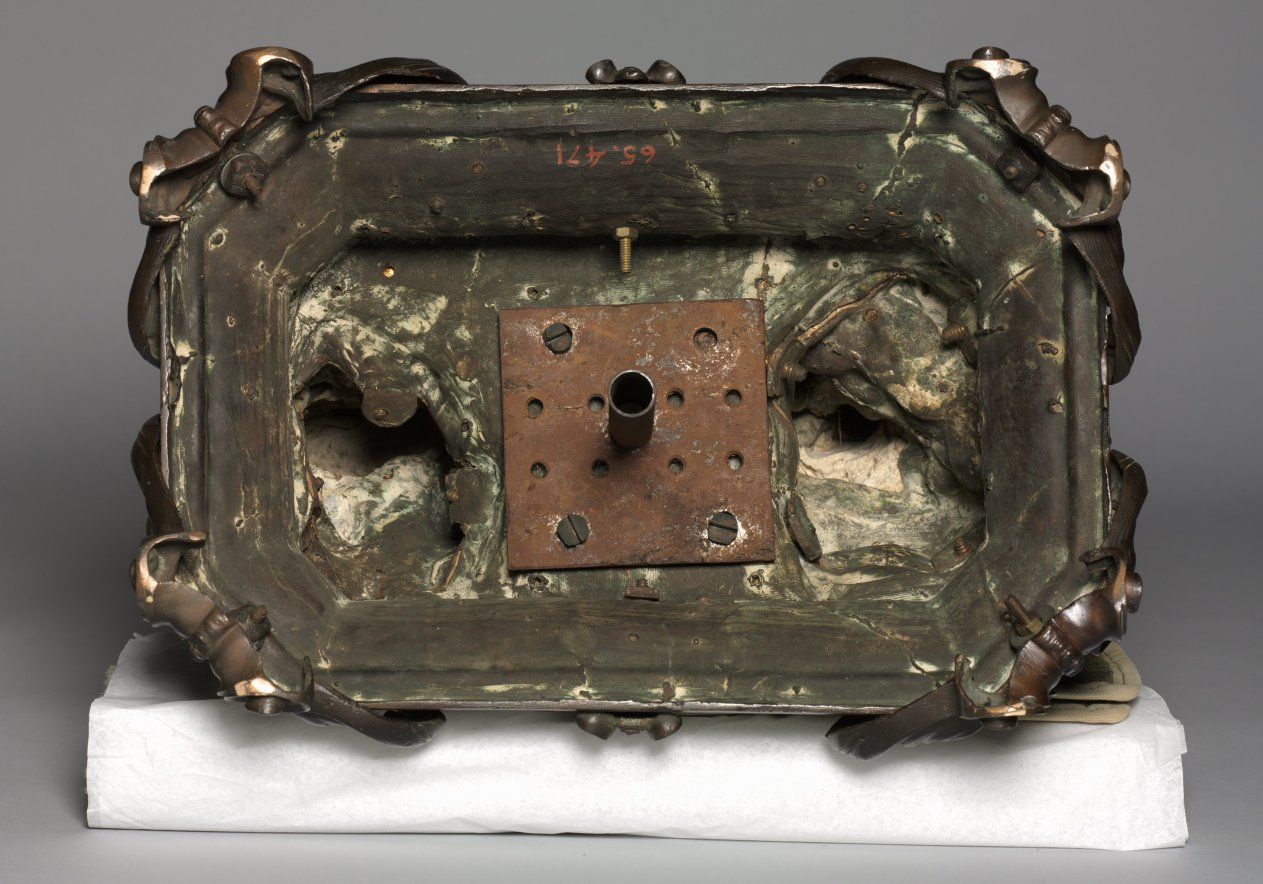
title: Baptism of Christ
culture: Italy, 17th century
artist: Alessandro Algardi (Italian, 1598–1654)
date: designed 1645–46, probably made 1650–55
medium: bronze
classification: Sculpture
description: When Innocent X (Giovanni Battista Pamphili, ruled 1644–55) became pope, Alessandro Algardi endeavored to obtain his patronage. This bronze Baptism of Christ is a casting from the molds used for an original silver sculpture that Algardi presented to the new pope to gain his support in 1646. The composition depicts an important scene in the life of Christ. On the right is John the Baptist, who pours water onto Jesus's head from a shell. As Christ bows his head to be baptized, a little angel holds the edge of his cloak. Algardi worked carefully to make this piece exciting from a number of points of view. Its dramatic emphasis shifts, depending on the viewer's vantage point.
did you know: Algardi's sculpture plays on its intended recipient's given name: Giovanni Battista (John the Baptist).